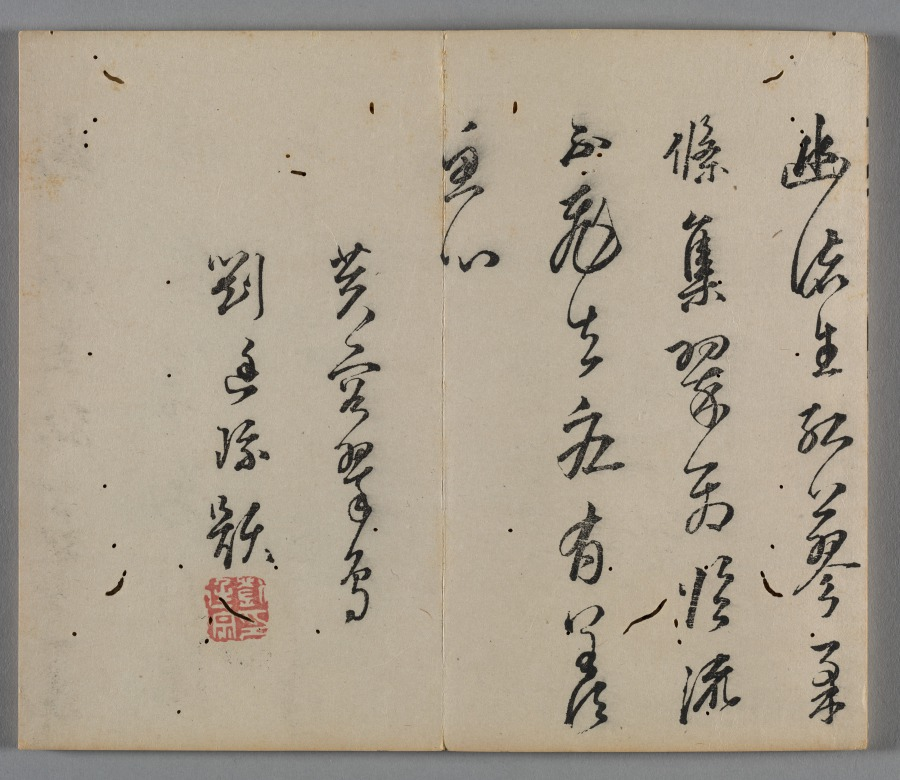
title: Ten Bamboo Studio Painting and Calligraphy Handbook (Shizhuzhai shuhua pu): Birds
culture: China, Qing dynasty (1644-1911)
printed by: Hu Zhengyan (Chinese, c. 1584–1674)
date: 1633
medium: Woodblock-printed book; ink and colors on paper; first edition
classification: Print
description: Color printing reached a level of perfection in the early 1600s, as seen in this Ten Bamboo Studio Collection of Calligraphy and Painting and the Mustard Seed Garden Manual of Painting (printed 1679 and 1701). The painterly quality, precision in registering (aligning) the woodblocks, and harmonious colors made them the most successful color print editions in Chinese history. Both editions were printed and compiled in Nanjing, spread nationwide, and had a great impact on the arts in Japan and Korea.